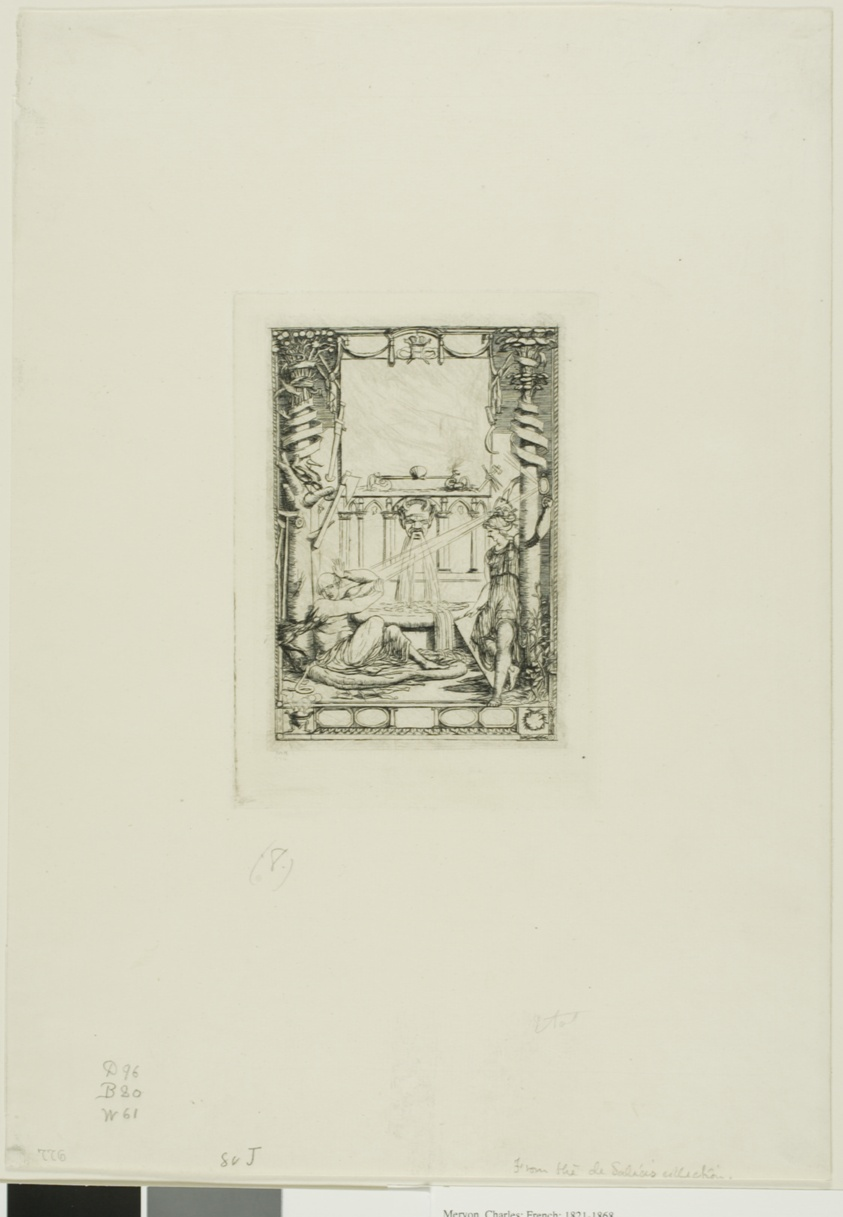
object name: Print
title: Frontispiece for the Catalogue of the Engravings of Thomas De Leu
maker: Charles Meryon (French, 1821-1868)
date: 1866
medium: Etching and engraving with burnishing on ivory laid paper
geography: France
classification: etching; print; prints and drawing